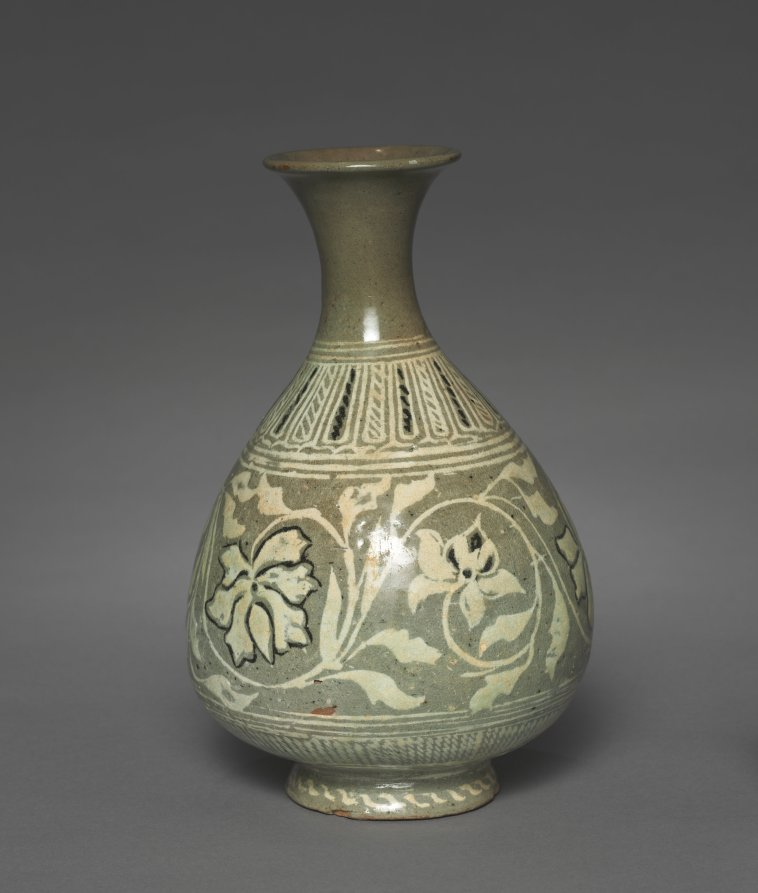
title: Bottle Inlaid with Peony and Scroll Design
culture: Korea, Joseon dynasty (1392–1910)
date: 1400s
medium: stoneward with inlaid, incised, and sgraffito design (Buncheong ware)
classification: Ceramic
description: Produced in both central and provincial kilns during during the 1400s–1500s, Buncheong (literally means "powdered green"), like this wine bottle commonly feature gray-green glaze due to the usage of less processed and refined clay high in iron. Many experimental techniques: white slip, inlay, stamping, and incising, which had been explored and perfected by Goryeo-period artists, were also adopted for bucheong pottery, yet resulting bold and whimsical visual impacts, completely different from elegant and refined Goryeo celadons.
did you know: The term buncheong, which refers to this type of pottery, means "powdered gray-green glazed ceramics.”